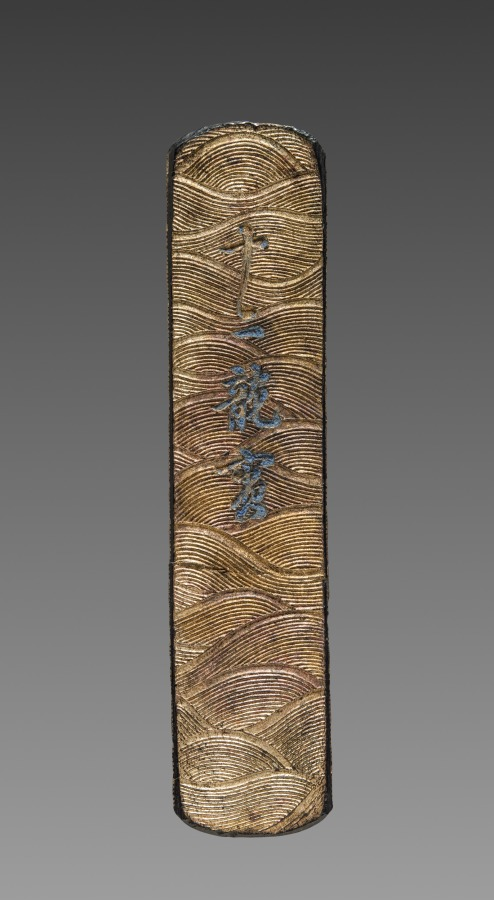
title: Ink Cake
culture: China, Qing dynasty (1644-1911)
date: 19th Century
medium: ink cake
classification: Miscellaneous